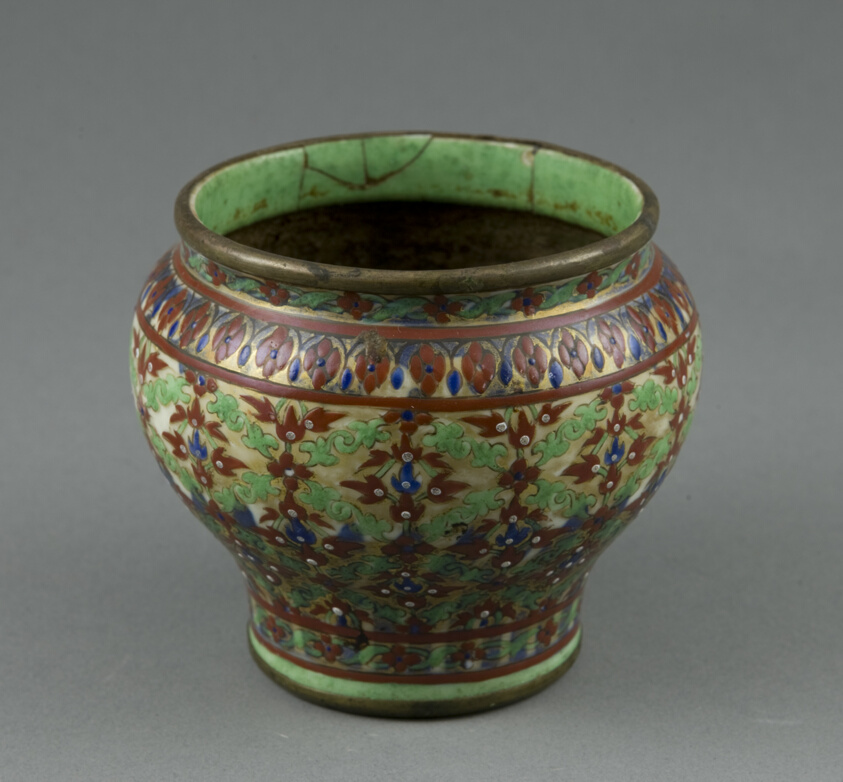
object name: Decorative Arts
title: Bencharong (Five-Colored) Ware, Spittoon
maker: China, for the Thai Market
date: 19th century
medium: Porcelain painted in overglaze polychrome enamels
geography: China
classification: porcelain; asian art; ceramics; decorative arts